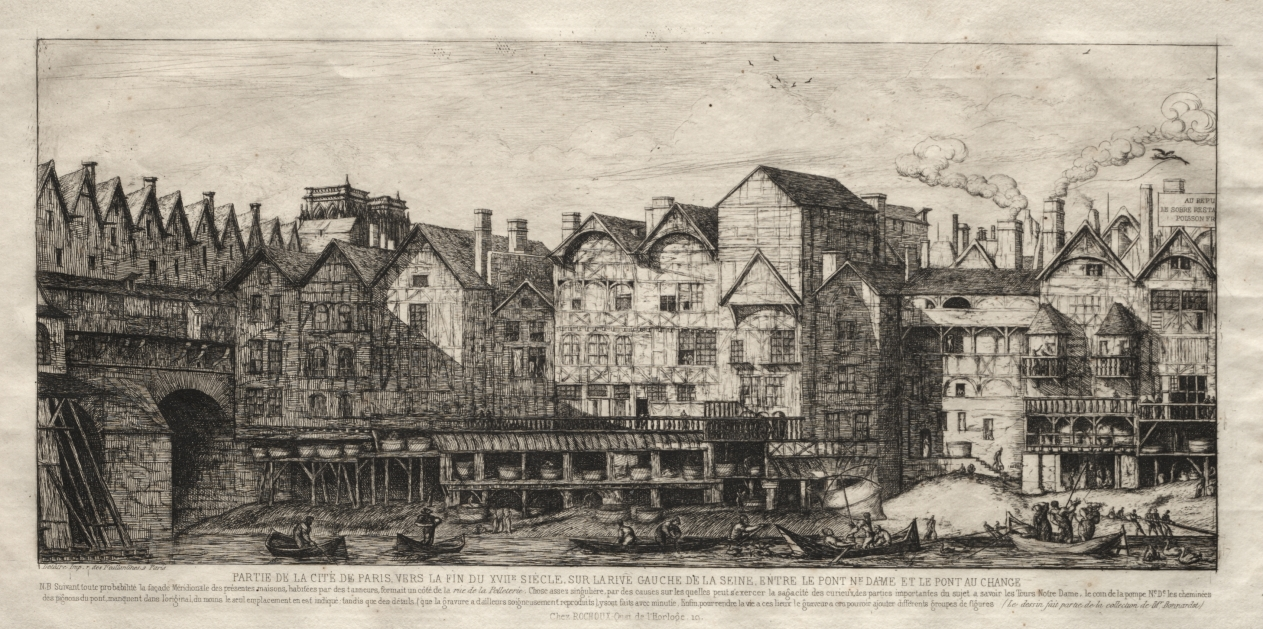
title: View of Part of the City of Paris, Towards the Close of the 17th Century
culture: France, 19th century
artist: Charles Meryon (French, 1821–1868)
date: 1861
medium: etching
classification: Print